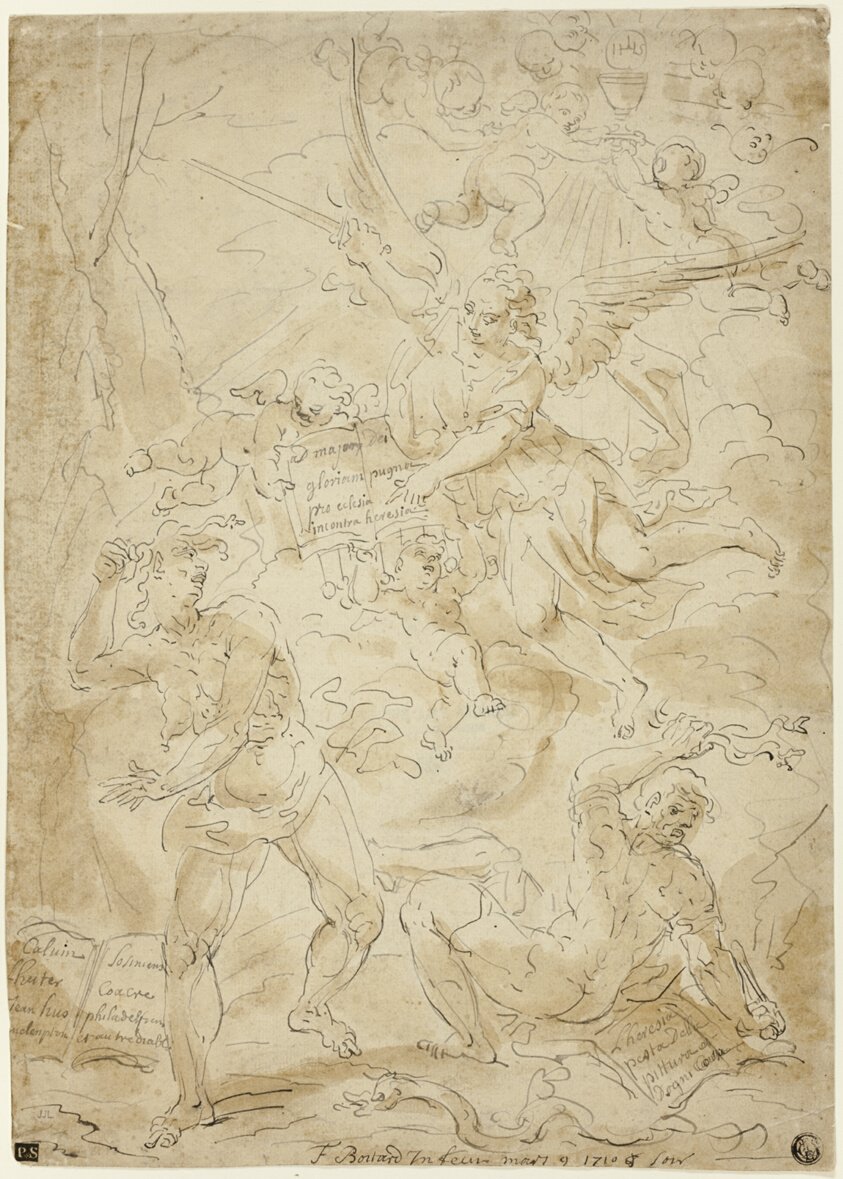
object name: Drawing and Watercolor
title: The Triumph of Truth Over Heresy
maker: Attributed to François Boitard (French, c.1670–c.1715); or Louis Philippe Boitard, the elder (French, active 1738-1763, died 1770)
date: c. 1710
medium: Pen and black ink, with brush and pale brown wash, over touches of graphite, on cream laid paper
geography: France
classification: pen and ink drawings; drawings (visual works); prints and drawing